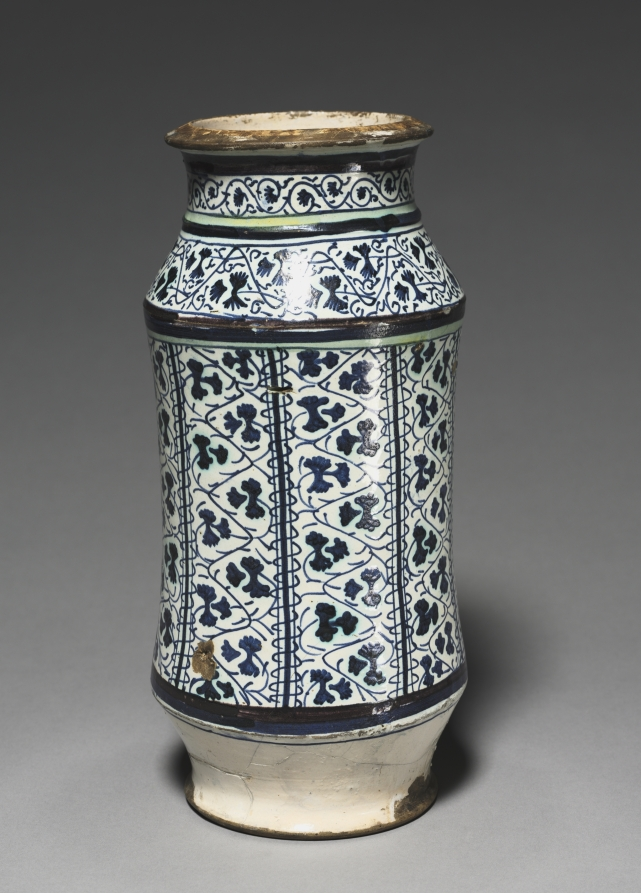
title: Pharmacy Jar (Albarello)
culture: Italy, Tuscany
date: c. 1450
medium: tin-glazed earthenware (maiolica)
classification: Ceramic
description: The albarello—a name of uncertain origin—was a pharmacist's jar used to hold dried herbs or medicinal compounds. It was usually closed by means of a piece of parchment or cloth stretched over its mouth and tied with a string. Its characteristic concave sides offered an easy grip to facilitate handling. This large albarello is one of the best of a small number of exquisitely decorated blue-and-white pieces produced in Tuscany in the mid-1400s.